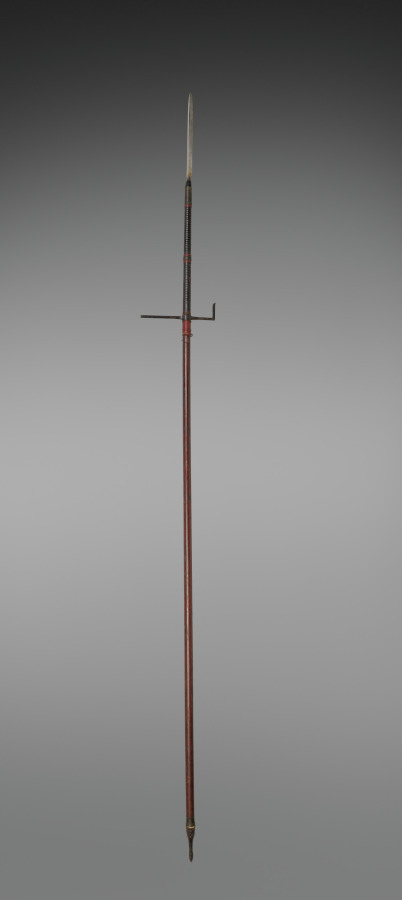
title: Spear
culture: Japan, Edo period (1615–1868)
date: 1700s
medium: wooden handle, metal blade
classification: Arms and Armor